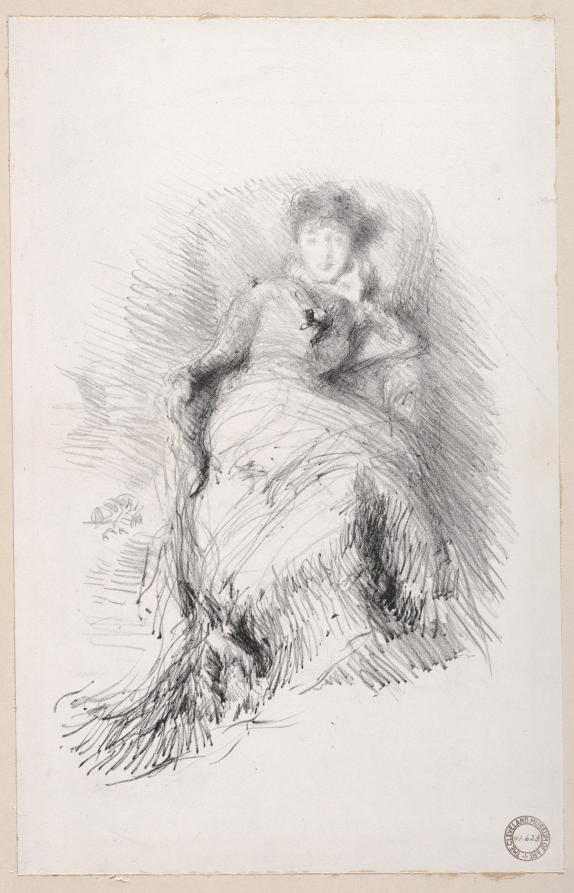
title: Study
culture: America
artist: James McNeill Whistler (American, 1834–1903)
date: 1878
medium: lithograph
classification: Print